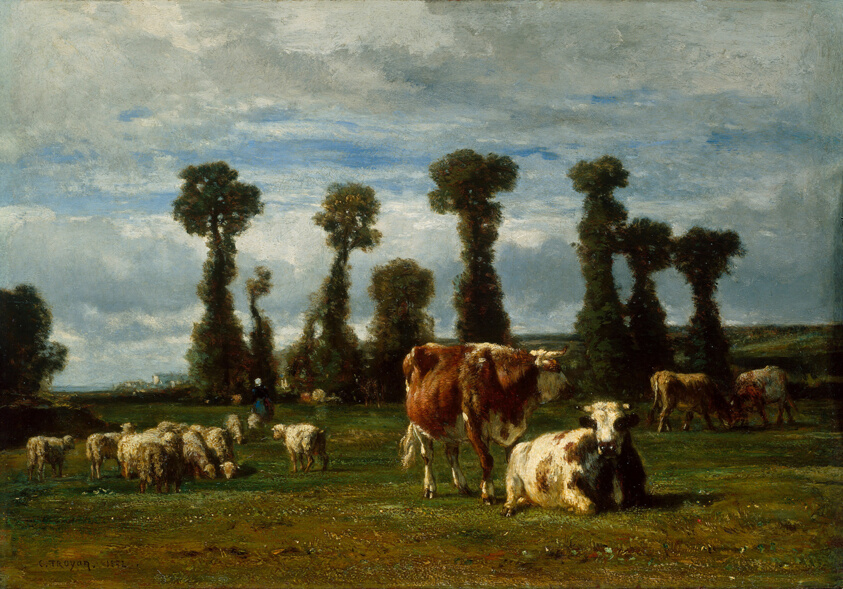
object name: Painting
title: Pasture in Normandy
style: Realism, nineteenth century, 19th century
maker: Constant Troyon (French, 1810–1865)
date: 1852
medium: Oil on panel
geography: France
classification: painting; paint; oil paintings (visual works); oil on panel; french; european painting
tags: animals, trees, sky, sheep, pastures, nature, landscapes, landscape, figures, farm, cows, clouds